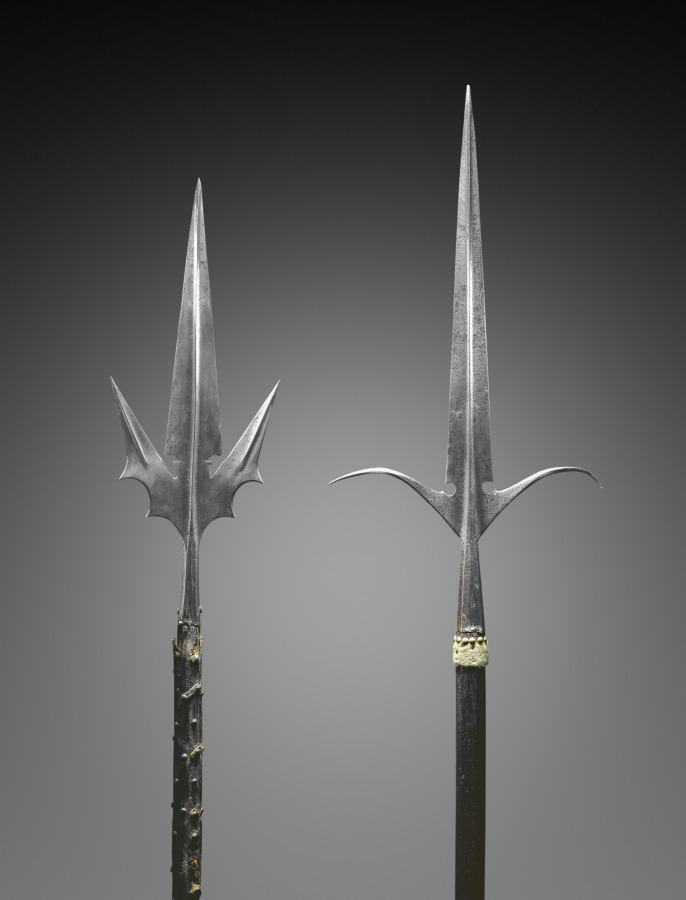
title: Corsèque (Chauve-Souris)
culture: North Italy, 16th century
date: c. 1530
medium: steel; round wood haft with leather straps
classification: Arms and Armor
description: The corsèque is a pole arm with a symmetrical three-pronged head consisting of a central double-edged blade and two sharp, upturned wings. The side blades served several functions: as guard to protect the soldier's hand when a thrust was delivered with the central blade; as a hook for unseating a mounted opponent; and to trip the opponent's horse. The corsèque was used mostly in Italy and France from the 1400s to the early 1600s.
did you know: The corsèque is said to have originated in Corsica, from where it takes its name.